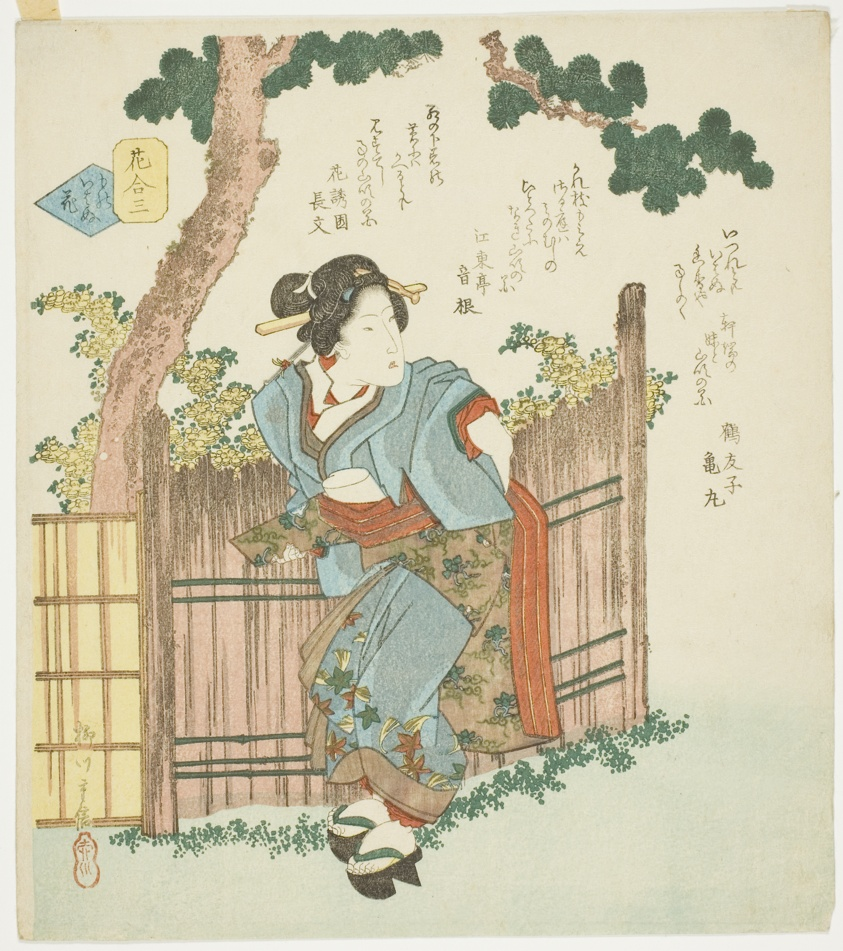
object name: Print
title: No. 3: Silent Flower (Mono iwanu hana), from the series "A Comparison of Flowers (Hana awase)"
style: Japanese (culture or style)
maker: Yanagawa Shigenobu II (Japanese, active c. 1820-late 1850s)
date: late 1820s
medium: Color woodblock print; shikishiban, surimono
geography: Japan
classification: woodblock print; print; asian art